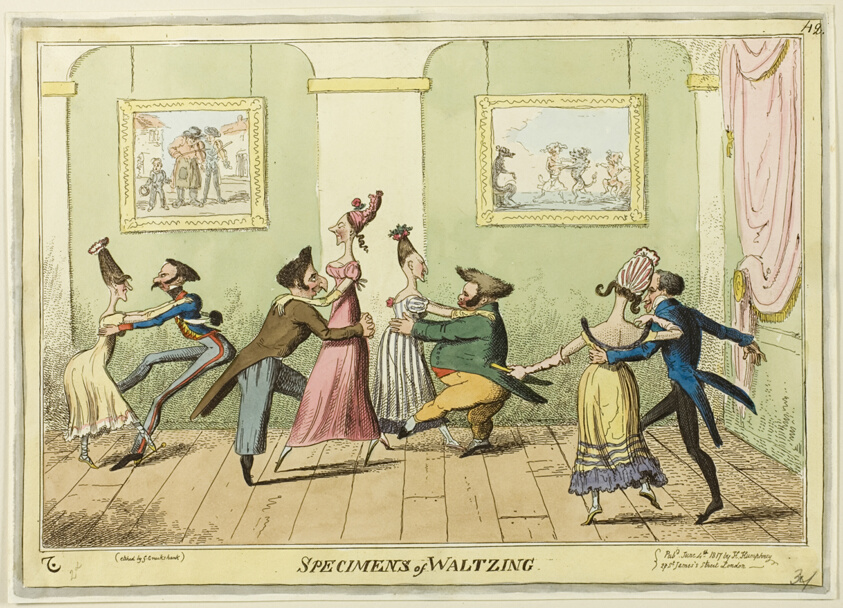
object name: Print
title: Specimens of Waltzing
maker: George Cruikshank (English, 1792-1878); published by Hannah Humphrey (English, c. 1745-1818)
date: published June 4, 1817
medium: Hand-colored etching on paper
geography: England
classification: etching; print; prints and drawing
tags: dogs, animals